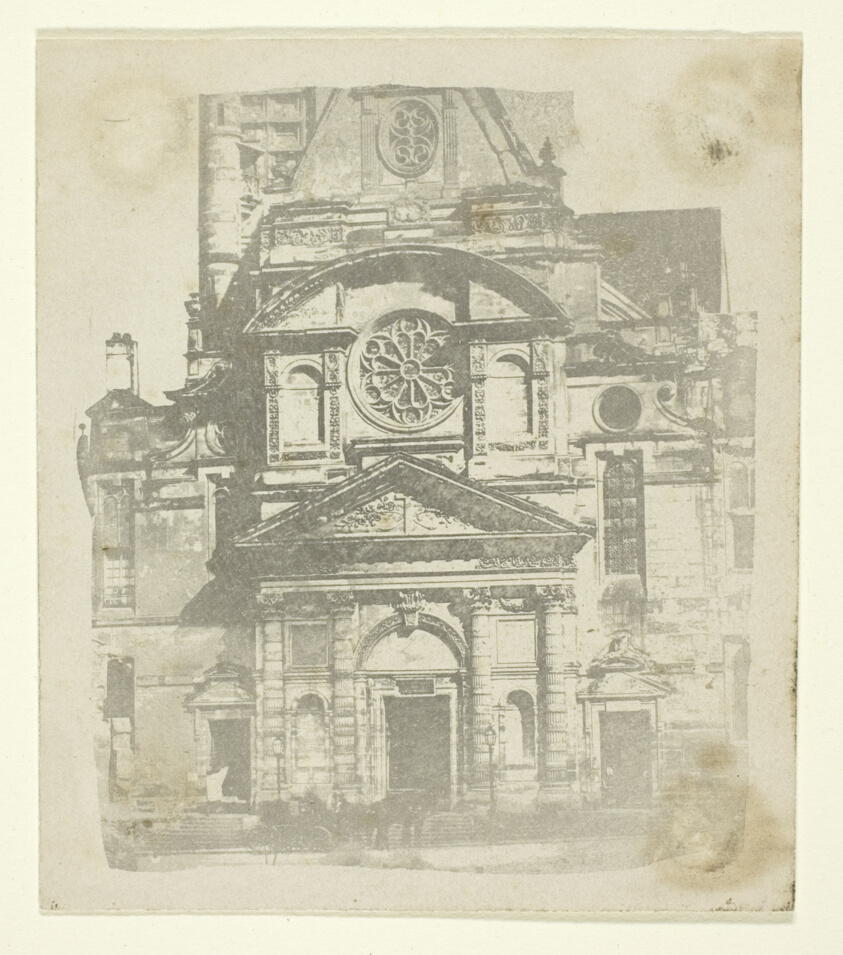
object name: Photograph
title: St. Etienne du Mont, Facade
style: 19th century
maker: William Henry Fox Talbot (English, 1800–1877)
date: c. 1853/58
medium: Photoglyphic engraving employing resin ground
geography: England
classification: engraving; printing process; photography; photograph